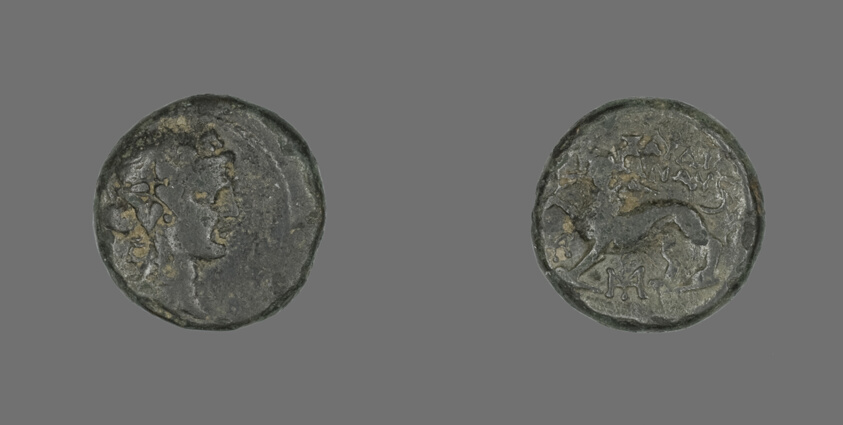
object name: Coin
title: Coin Depicting the God Dionysos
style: greek, ancient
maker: Greek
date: about 133 BCE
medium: Bronze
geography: Ancient Greece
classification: coin; ancient art